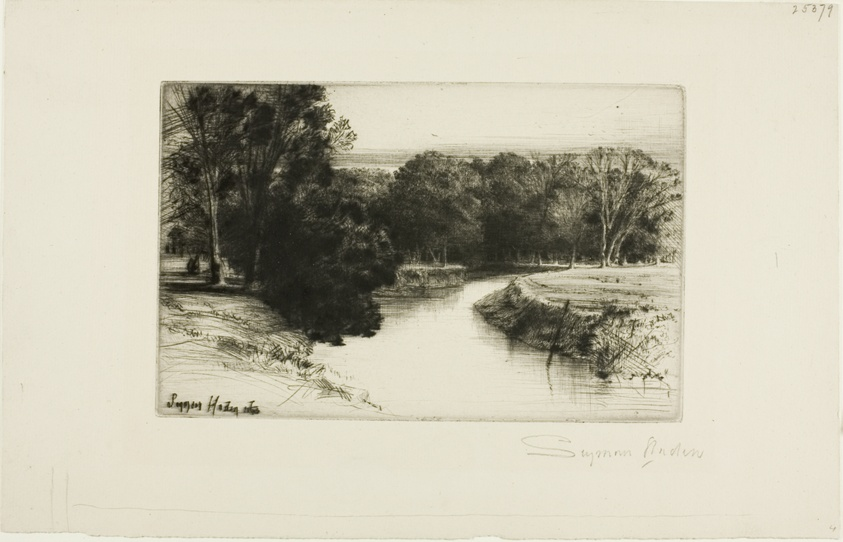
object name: Print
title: A Sunset in Ireland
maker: Francis Seymour Haden (English, 1818-1910)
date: 1863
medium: Etching and drypoint on ivory laid paper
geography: England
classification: etching; print; prints and drawing